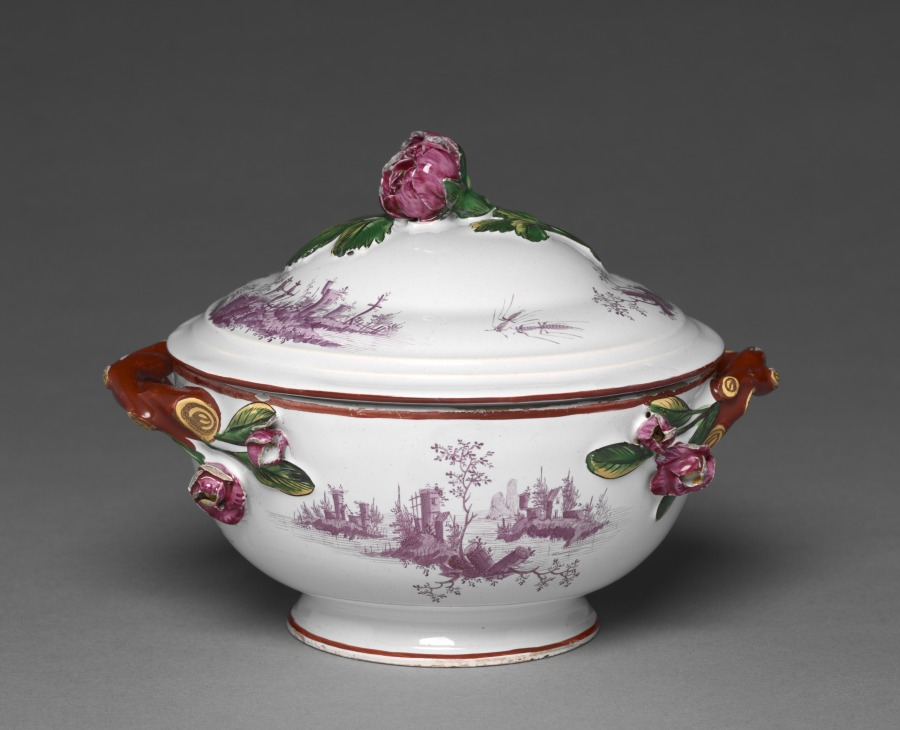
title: Covered Bowl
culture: France, 18th century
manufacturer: Saint-Clément Factory (French)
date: c. 1775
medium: tin-glazed earthenware (faience) with enamel decoration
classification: Ceramic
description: The faience factory at Saint-Clément in eastern France closely imitated the styles and techniques employed by the Hannong's at Strasbourg. The monochrome landscapes in red on this covered bowl demonstrate the influence of German, in this case Meissen, porcelain on the faience made in this part of France.